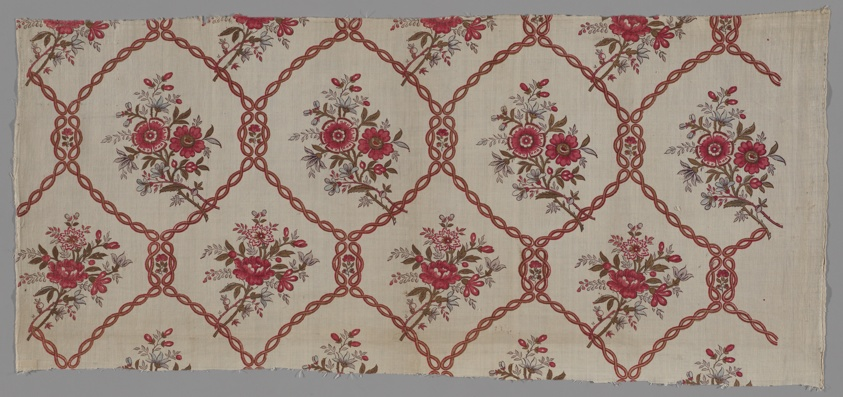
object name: Textile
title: Fragment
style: jouy-en-Josas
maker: France, probably Jouy-en-Josas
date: c. 1778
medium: Cotton, plain weave; engraved roller printed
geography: France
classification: textile; weaving - printed; weaving